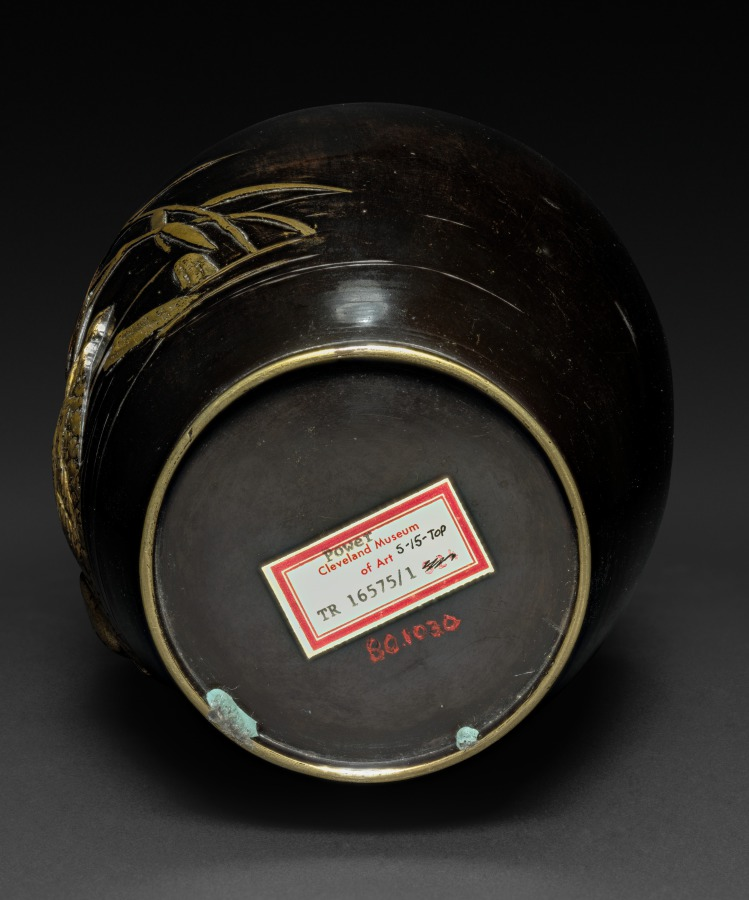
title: Bas relief Vase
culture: Japan, Meiji period (1868–1912)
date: c 1880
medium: bronze, gilding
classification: Metalwork